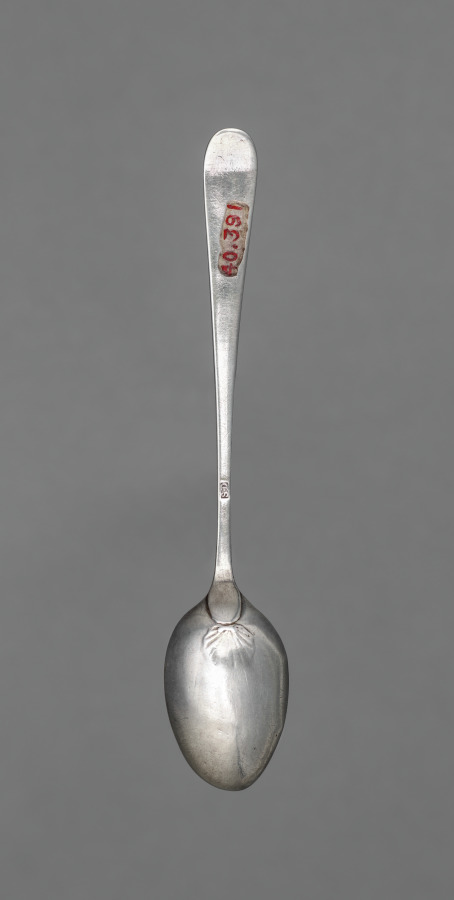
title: Teaspoon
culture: America, New Hampshire, Portsmouth, 18th century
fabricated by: Samuel II Drowne (American, 1749–1815)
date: c. 1770–1780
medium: silver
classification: Silver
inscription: engraved "M=F" in shaded block letters on top of handle end.